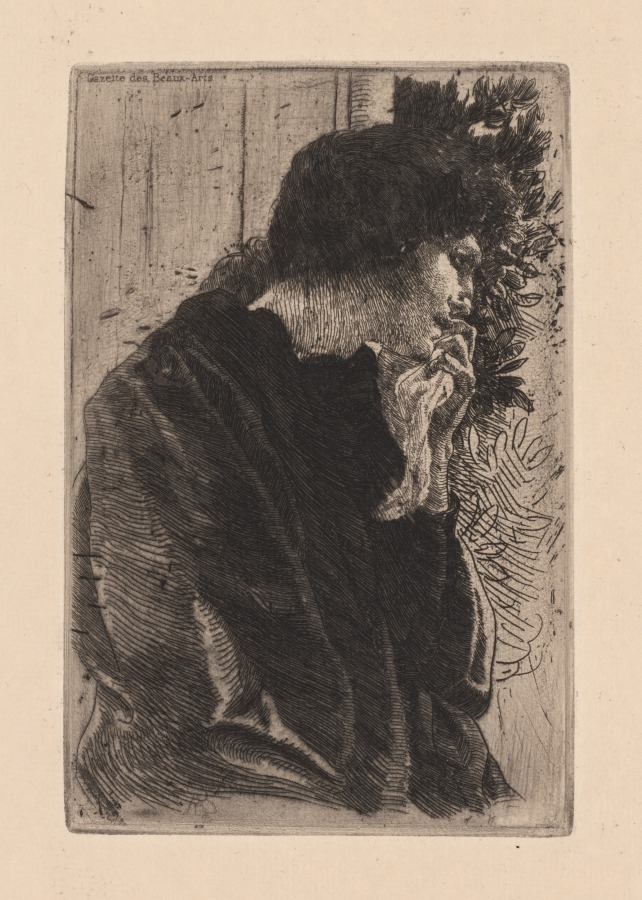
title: Sadness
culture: France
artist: Albert Besnard (French, 1849–1934)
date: 1887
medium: Etching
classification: Print